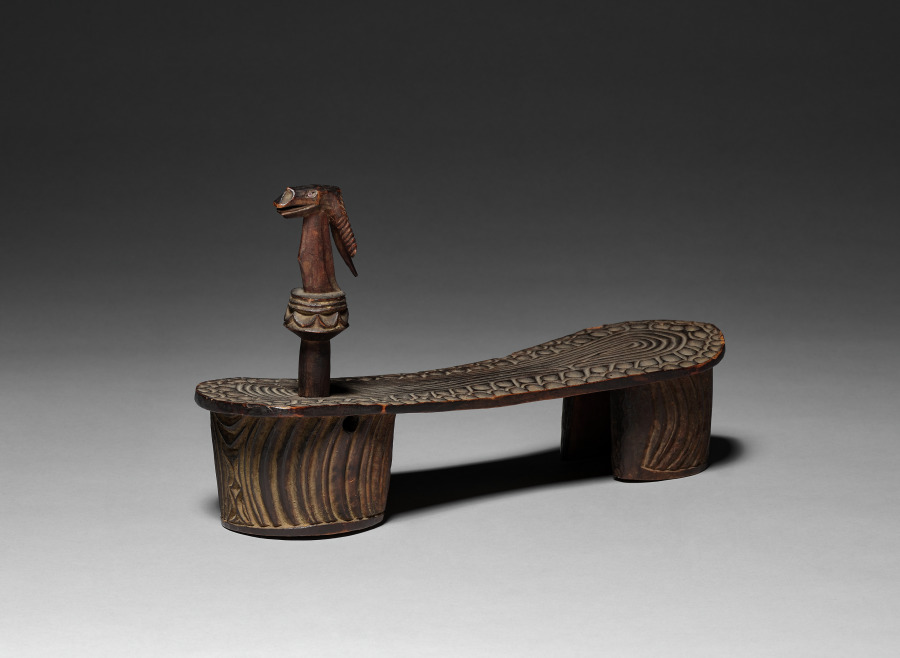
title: Sandal (mtalawanda / mtawanda) or Clog (kiatu cha mti)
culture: Africa, Central Africa, Democratic Republic of Congo, unidentified carver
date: c 1800s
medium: Wood and glass beads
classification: Wood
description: Common in the Indian Ocean region, wooden sandals changed meaning across place and time. This pair’s base elevates the foot as the toes grip an antelope-shaped peg (msuruaki). Crisp geometric sole designs suggest they were rarely worn. East African elites and merchants once had exclusive rights to wooden shoes, wearing elaborate ones only for portraits. Formerly enslaved people living along the coast wore simpler ones from the 1840s onward, adopting elite footwear to assert their liberation. However, slave traders like the Zanzibari “Tippu Tip” (c. 1832–1905) likely brought mitalawanda to Central Africa; stylistic elements of this pair hail from that region.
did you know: This distinctive footwear traveled from Southeast Asia and the Middle East to Africa, first to the Swahili Coast and then further inland to parts of Central Africa. The deity Krishna wears similar shoes (paduka) in an eighteenth-century Indian miniature painting (2003.344).